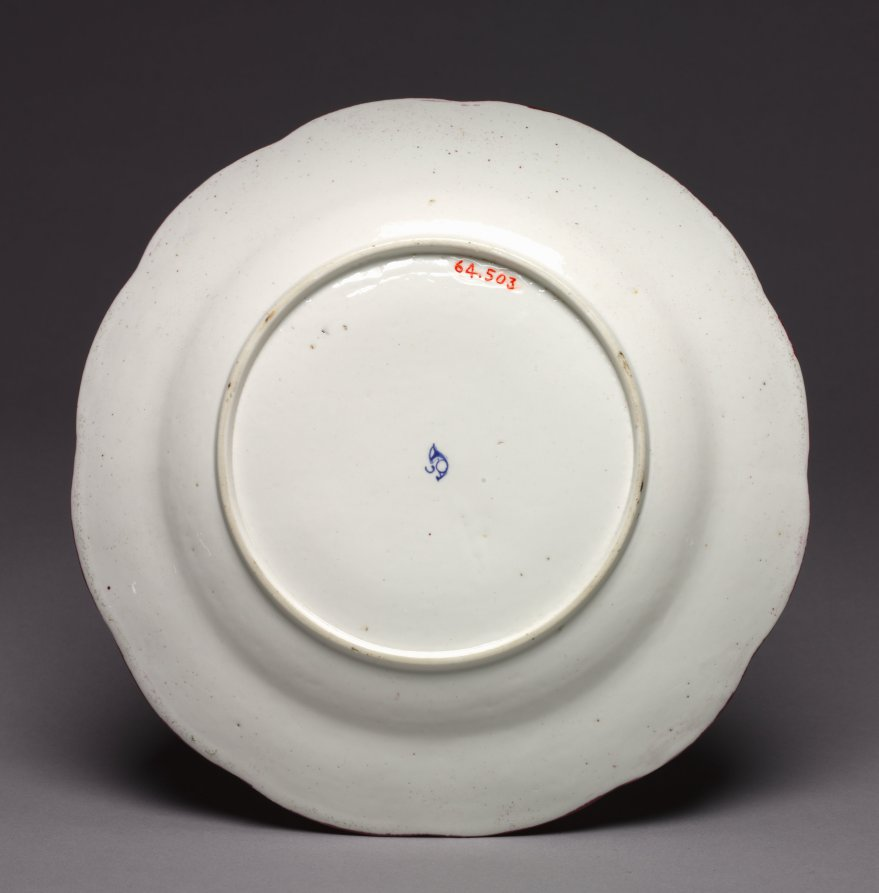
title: Plate (Assiette)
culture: France, Chantilly, 18th century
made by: Chantilly Porcelain Factory (French)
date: c. 1757–60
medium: soft-paste porcelain with enamel decoration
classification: Ceramic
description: This plate was originally part of a service owned by Don Filippo Infante, duke of Parma. Married to Marie Louise Élisabeth, the eldest daughter of Louis XV, the couple greatly patronized porcelain produced at the Chantilly factory. The basket weave border was a style inspired by models produced at the Vincennes-Sèvres porcelain factory which was, in turn, inspired by models produced at the Meissen factory in Germany.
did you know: The hatched border of this plate was likely produced by engine-turning, a process by which clay is turned on a rotating tool to produce fluted, geometric, and diced patterns.